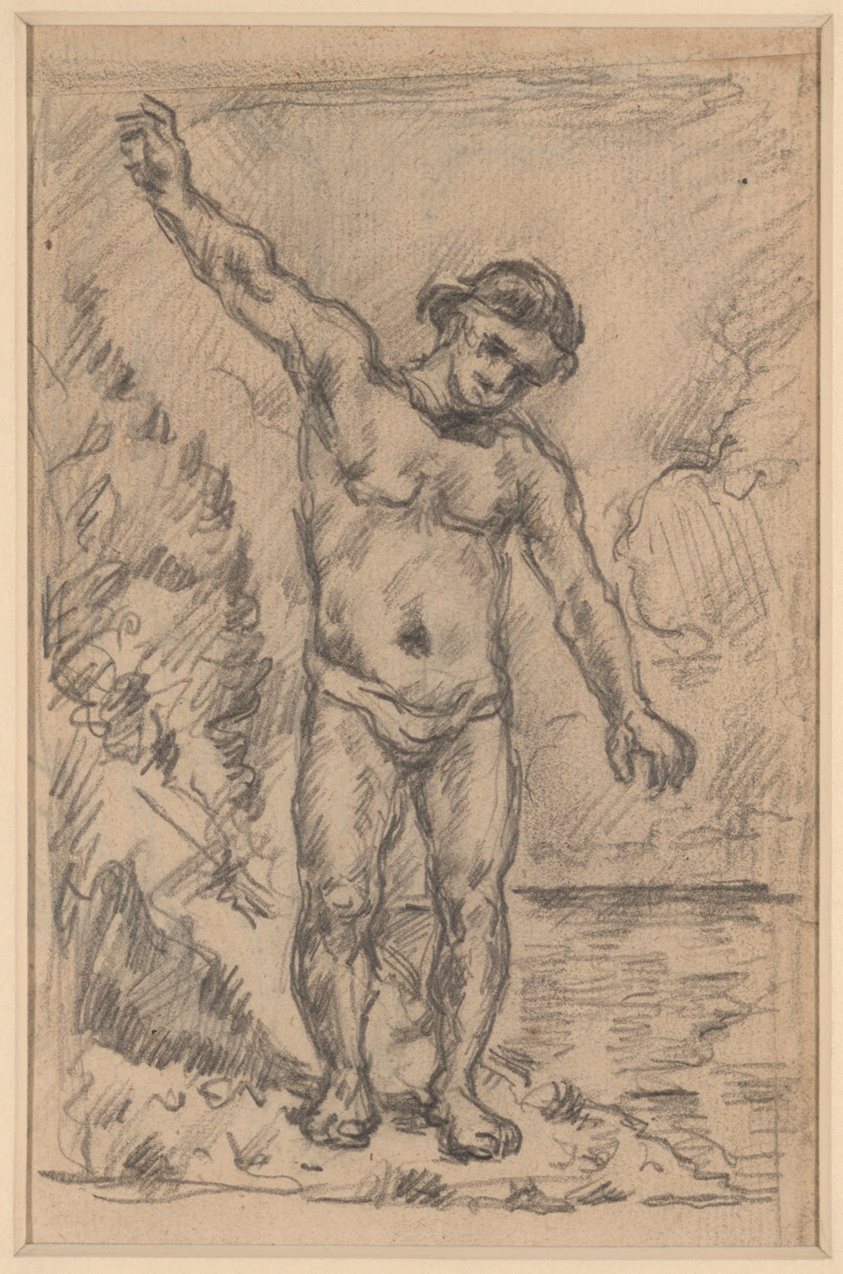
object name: Drawing and Watercolor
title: Bather With Outstretched Arms (recto); Study of a Tree (verso)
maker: Paul Cézanne; French, 1839–1906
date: 1874/77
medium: Graphite on cream laid paper (pieced)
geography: France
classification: drawings (visual works); paper; grapite; prints and drawing